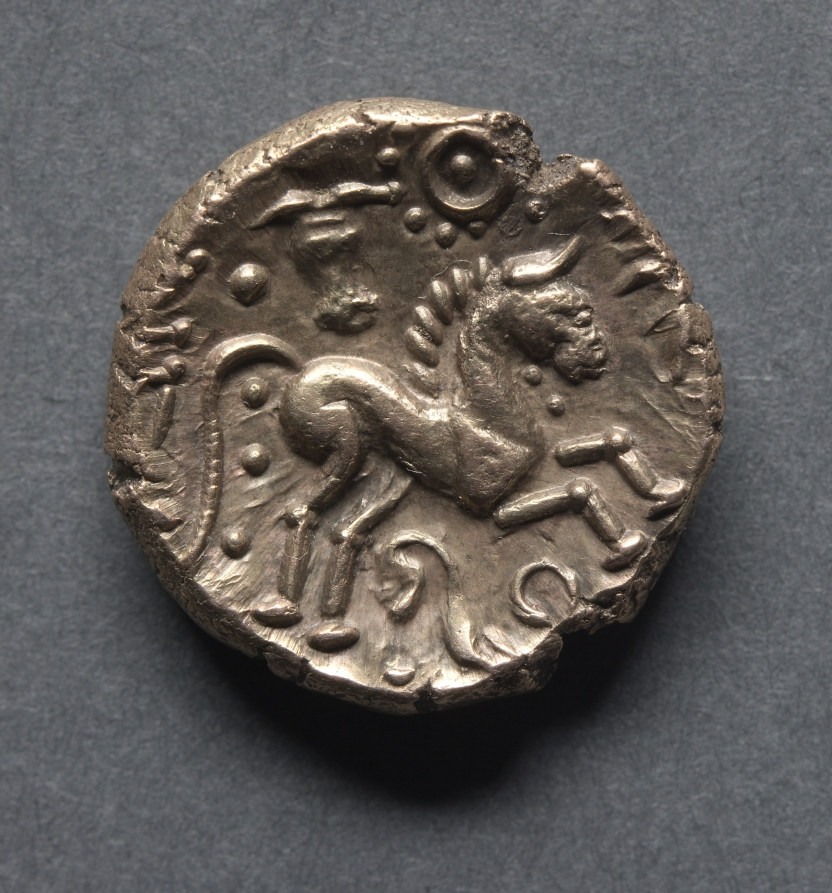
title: Tasciovanus Stater: Horse and Bucranium (Head of Ox) (reverse)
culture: England, Catuvellauni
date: 20 BCE–10 CE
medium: gold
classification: Coins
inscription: TASCIAV